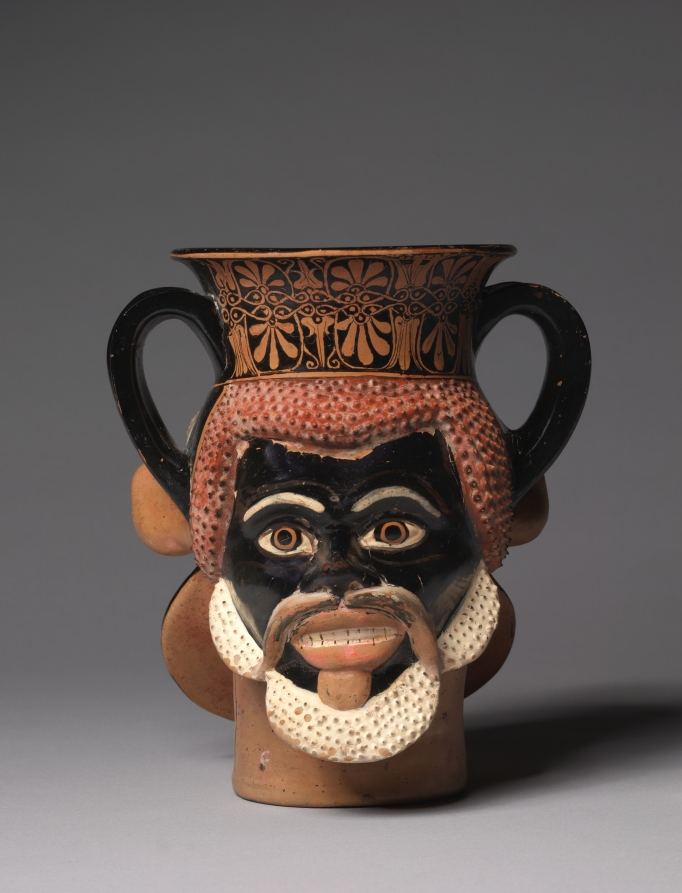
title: Red-Figure Janiform Kantharos (Two-Sided Head-Shaped Drinking Cup): Satyr and African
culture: Greek, Attic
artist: assigned to Class K (The Toronto Class)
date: c. 470–460 BCE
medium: ceramic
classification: Ceramic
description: Combining two mold-made faces beneath a pair of vertical handles and a flaring, wheel-made lip, this unusual drinking cup is a variation of the kantharos, a vessel favored by the wine god Dionysos. A snub nose and equine ears identify the satyr, a relatively common type on such vessels. The glossy black face and red hair on the other side are more unusual, apparently meant to show an older African man, with white beard and eyebrows, and wrinkles around the eyes.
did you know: This janiform kantharos is unique in juxtaposing heads of a satyr and an African man.